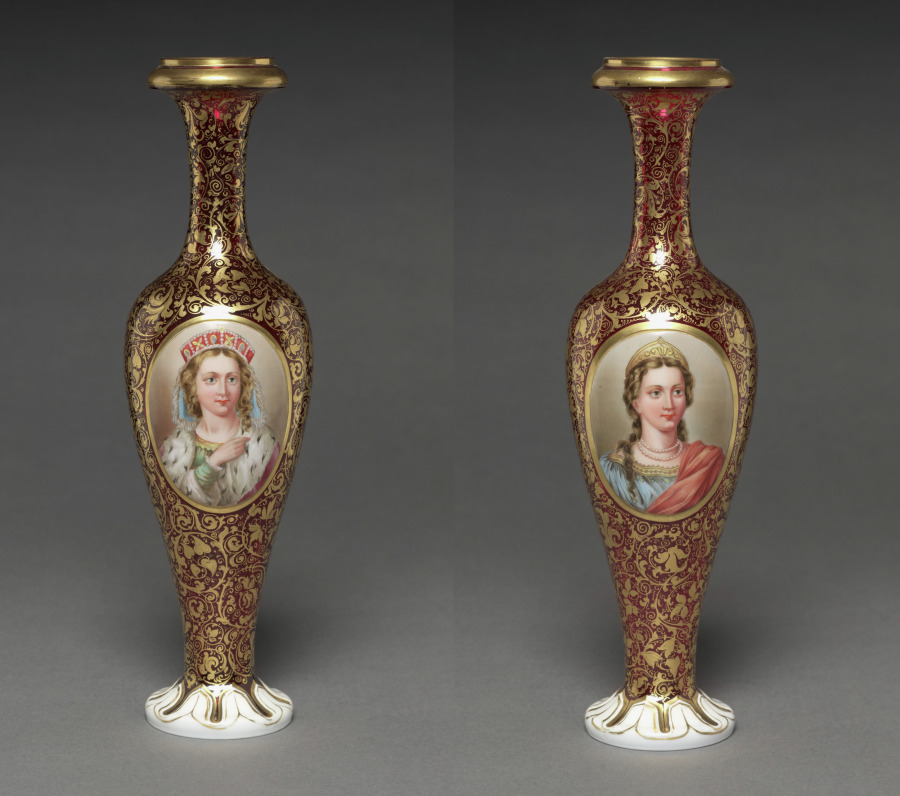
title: Vases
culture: Bohemia (?), 19th century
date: 1840–1860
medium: glass with enamel and gilt decoration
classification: Glass